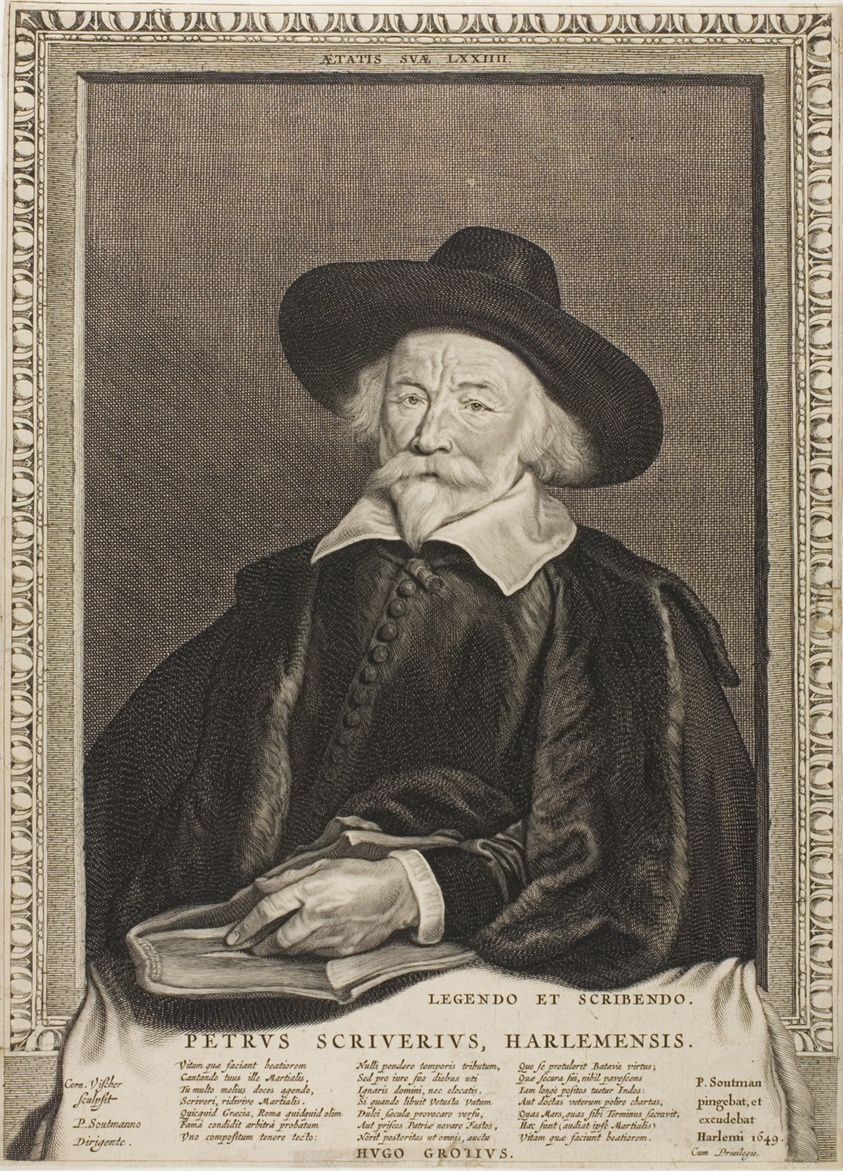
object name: Print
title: Peter Scriverius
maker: Cornelis Visscher (Dutch, c. 1629-1658); after Pieter Claesz. Soutman (Dutch, c. 1580–1657)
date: 1649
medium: Engraving and etching on cream laid paper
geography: Holland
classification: engraving; print; prints and drawing